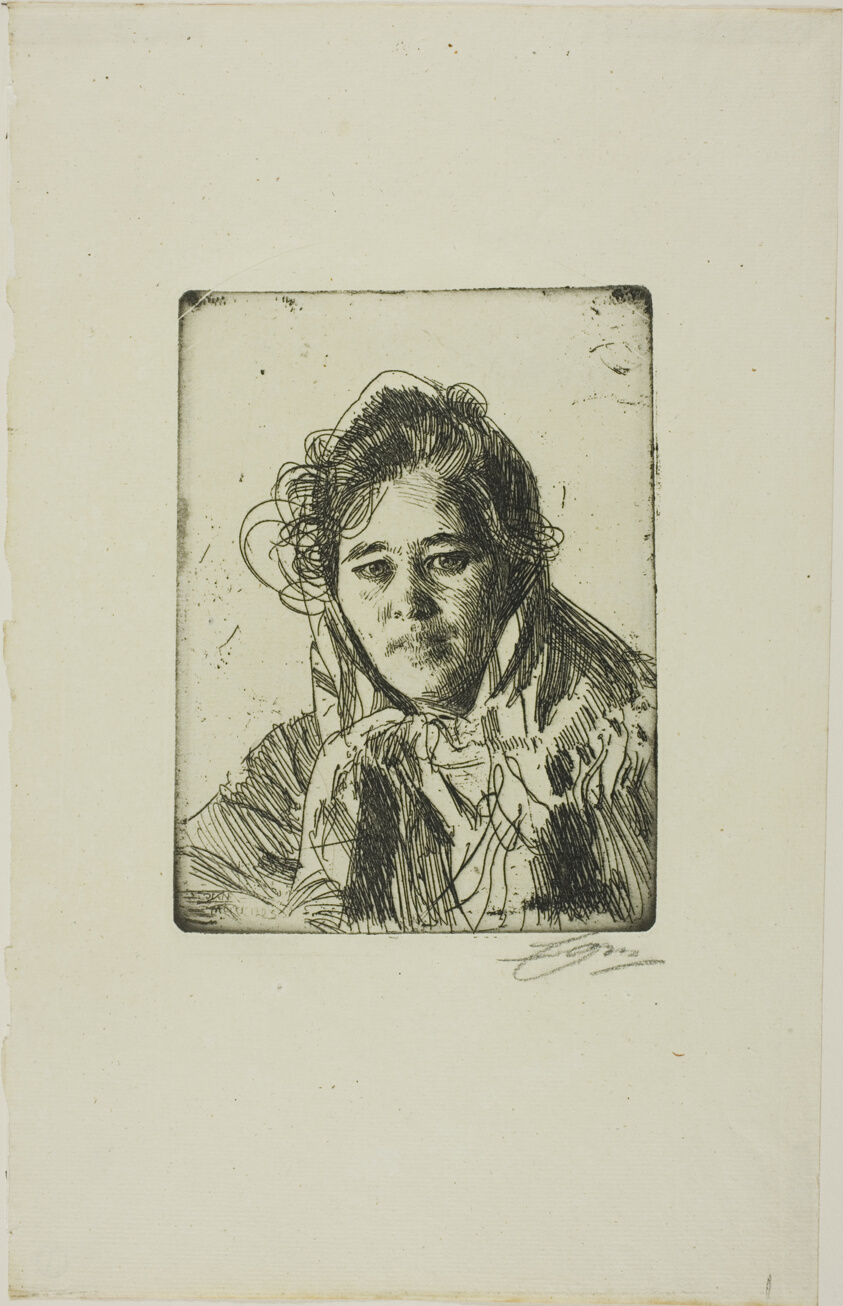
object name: Print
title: Young Girl from Mora (Kråkberg's Anna)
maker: Anders Zorn (Swedish, 1860-1920)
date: 1903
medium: Etching on ivory laid paper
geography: Sweden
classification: engraving; print; prints and drawing